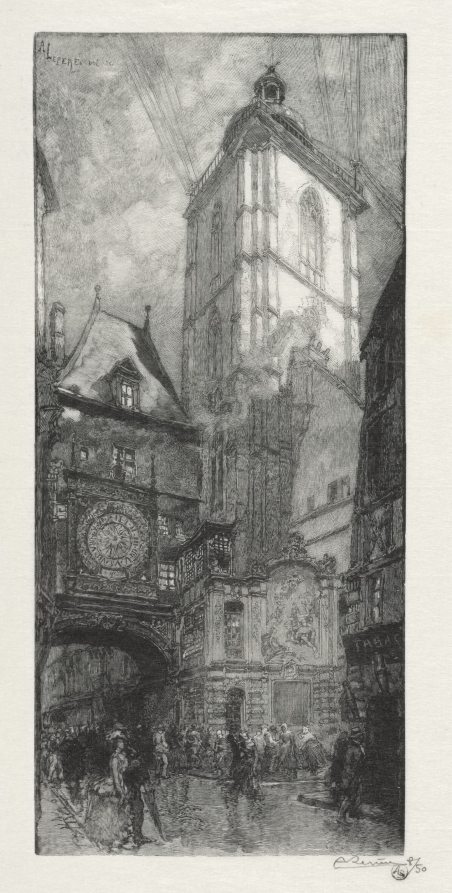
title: Rouen Illustré: La Gros Horloge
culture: France, 19th century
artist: Auguste Louis Lepère (French, 1849–1918)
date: 1888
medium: wood engraving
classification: Print